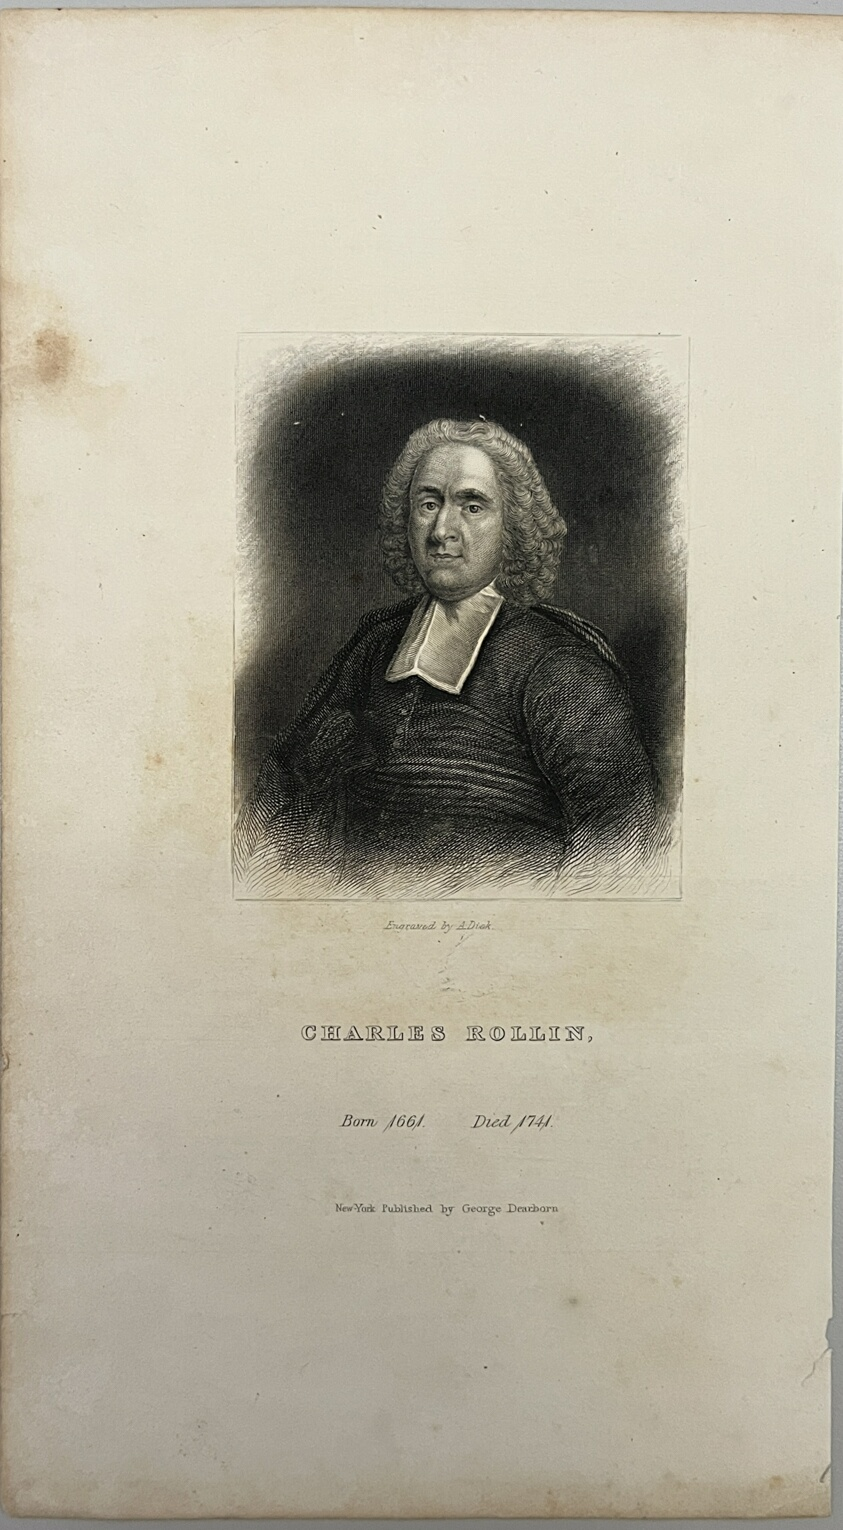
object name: Print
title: Charles Rollin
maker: Likely Archibald L. Dick. (Scottish, active in America, 1805-1855); published by George Dearborn (American, 19th century)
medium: Steel engraving on paper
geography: Scotland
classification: reproduction; print; prints and drawing